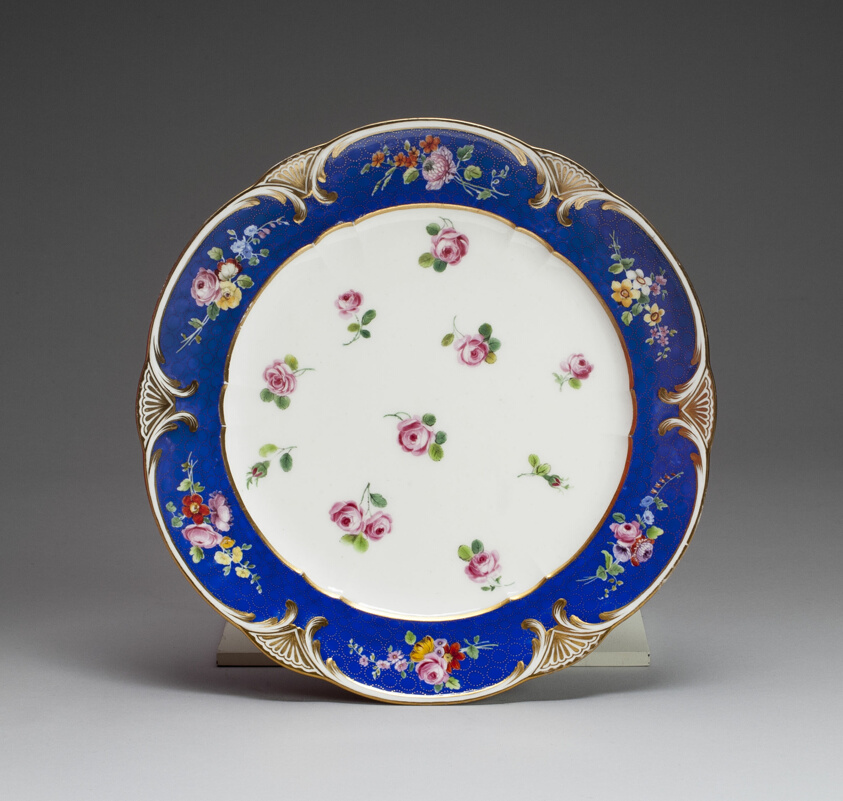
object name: Ceramics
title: Plate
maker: Sèvres Porcelain Manufactory; French, founded 1740; Painted by Edme François Bouillat père; French,1739/40–1810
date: 1771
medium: Soft-paste porcelain, dark blue ground, polychrome enamels, and gilding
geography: Sèvres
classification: plate (general, dish); tableware; dish (vessel); ceramics; porcelain; european decorative arts